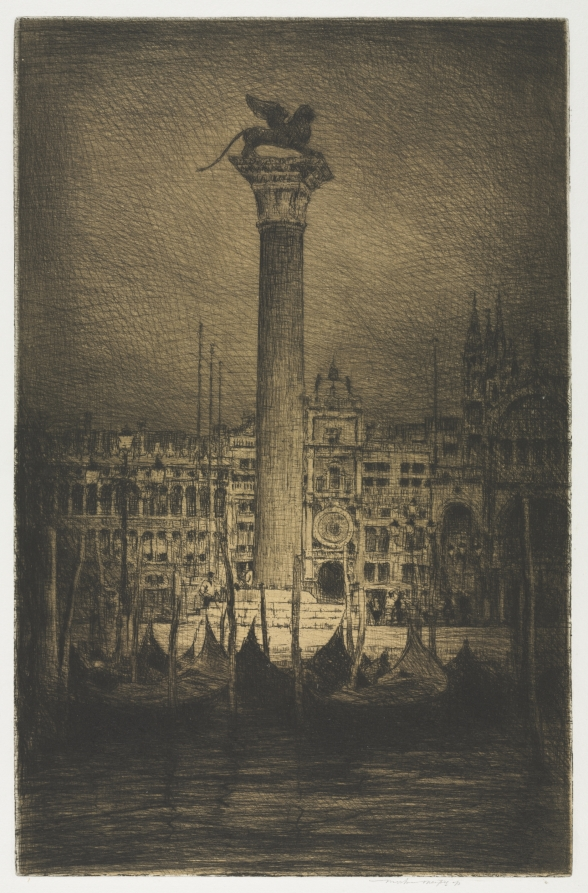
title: St. Mark's Piazza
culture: England, 19th century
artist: Mortimer Menpes (British, 1860–1938)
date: 1910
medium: etching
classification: Print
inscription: signed, below platemark, in graphite; lower left, in graphite: "482"